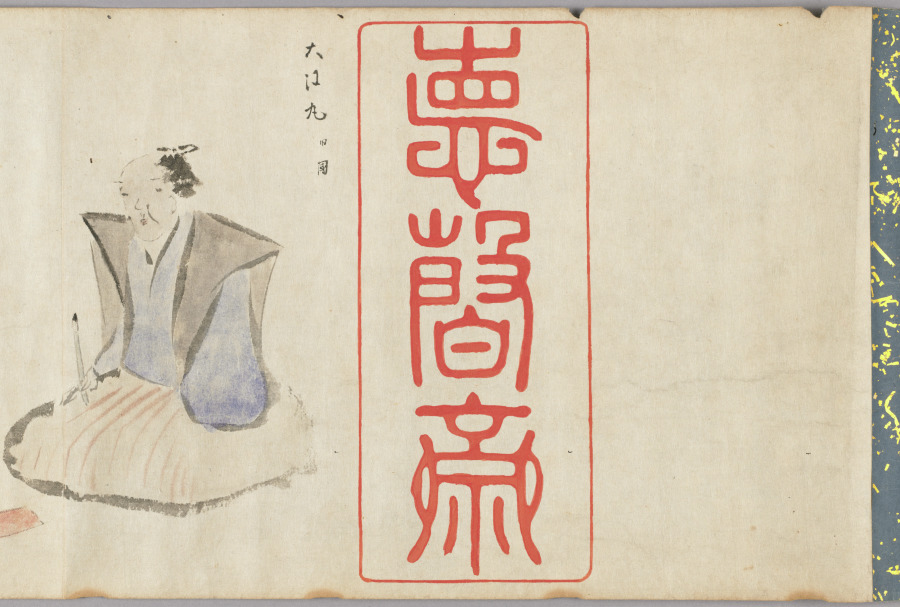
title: Chinese Seals and Poets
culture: Japan, Edo period (1615–1868)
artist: Hosokawa Rinkoku (Japanese, 1779–1843)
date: 1842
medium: handscroll; ink and color on paper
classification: Painting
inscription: Eight seal impressions are painted in red and alternate with sketchily painted figures. Artist's colophon at end of scroll.